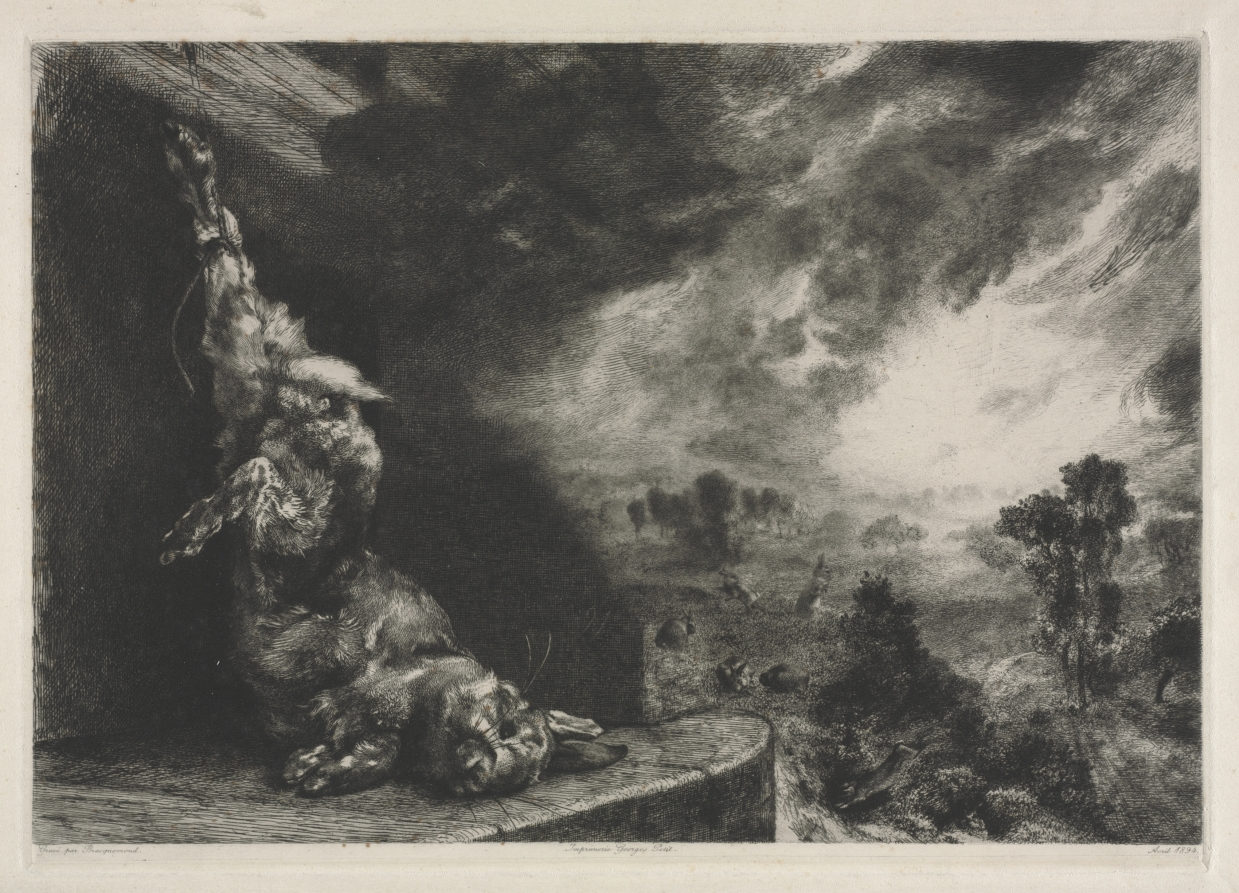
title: The Large Rabbit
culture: France, 19th century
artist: Félix Bracquemond (French, 1833–1914)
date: 1891, printed 1894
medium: etching and drypoint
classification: Print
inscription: printed: Gravé par Bracquemond / Imprimerie Georges Petit / Avril 1894